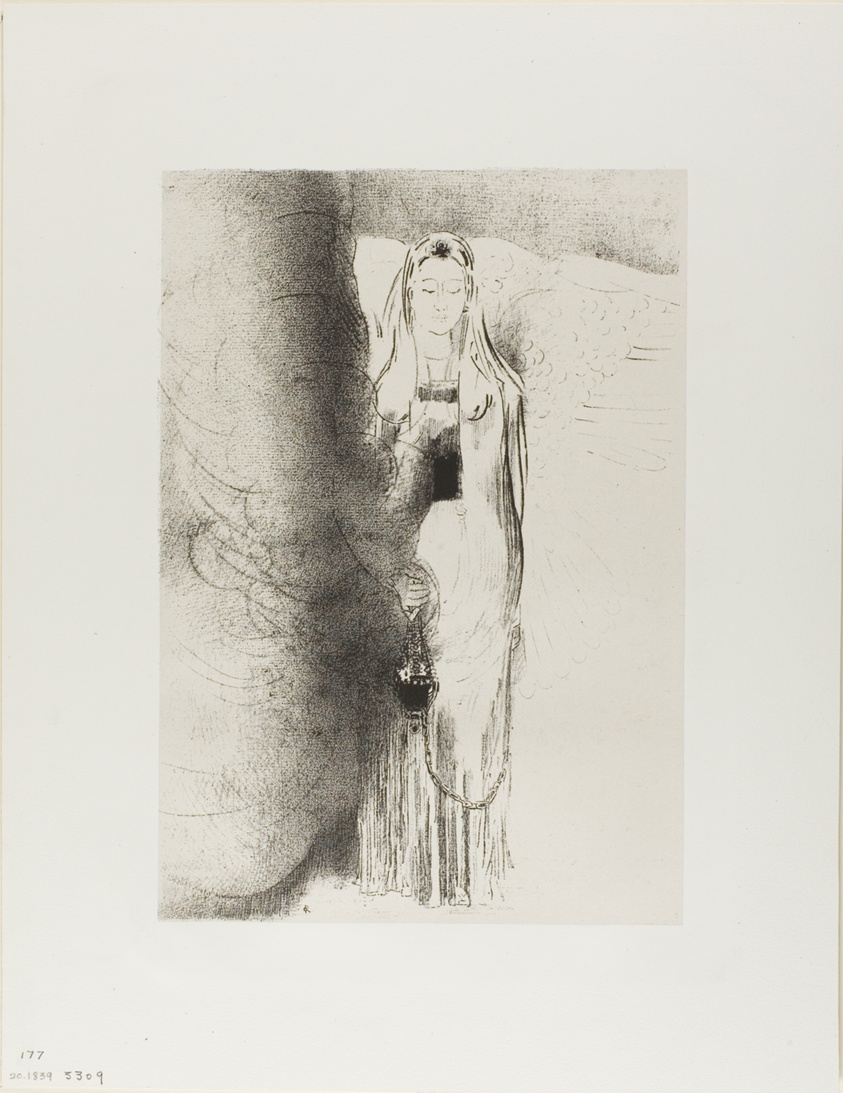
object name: Print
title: And the Angel Took the Censer, plate 4 of 12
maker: Odilon Redon (French, 1840-1916)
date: 1899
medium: Lithograph in black on cream China paper laid down on ivory wove paper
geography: France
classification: lithograph; print; prints and drawing; paper